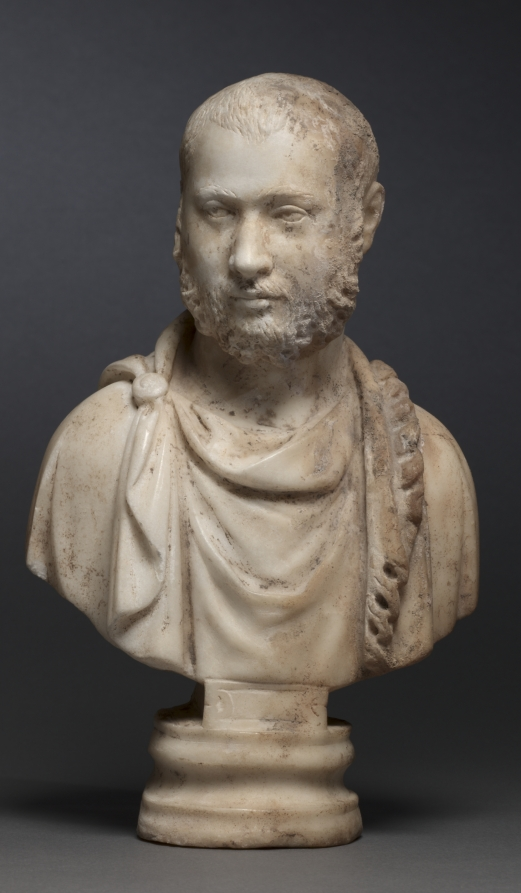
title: Portrait Bust of an Aristocratic Man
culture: Anatolia, late Roman-early Christian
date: 280–90 CE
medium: marble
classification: Sculpture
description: These busts are thought to have been unearthed with the Good Shepherd and Jonah sculptures. The nearly identical facial characteristics of each sitter-three males and three females-suggest that the same man and woman was represented three times. Although the intended function of the busts remains unknown, they probably represent a husband and wife. The portraits have been dated stylistically, as well as by costume and hairstyle, to the 270s ad. One of the men wears a paludamentum, or fringed cloak. One of the women wears a decorative stole, an attribute of rank probably conferred on her by her husband. The most distinctive feature of the female portraits is the hairstyle, a variation of the scheitzelkopf, in which the hair, after being combed behind the ears down to the nape of the neck, is braided, pulled up over the top of the head and folded under at the front. Careful study of the evolution of women's coiffures supports a date of 270 to 280 ad for the portraits, about the same as the symbolic sculptures of Jonah and the Good Shepherd. The rarity of intentionally paired portrait busts in late antiquity, especially those in a series, raises questions as to their original function. The busts may have been commemorative and intended for distribution as diplomatic gifts. It is likely that they were commissioned by a single, important patron or family to enhance their social or political status.